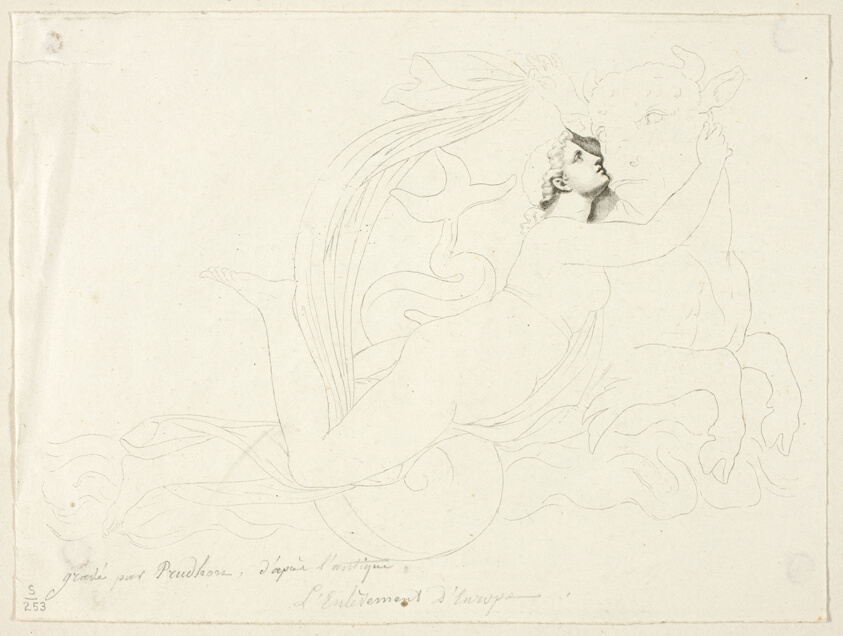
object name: Print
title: Rape of Europa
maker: Pierre-Paul Prud'hon; French, 1758-1823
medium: Etching in black on paper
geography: France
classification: etching; print; prints and drawing